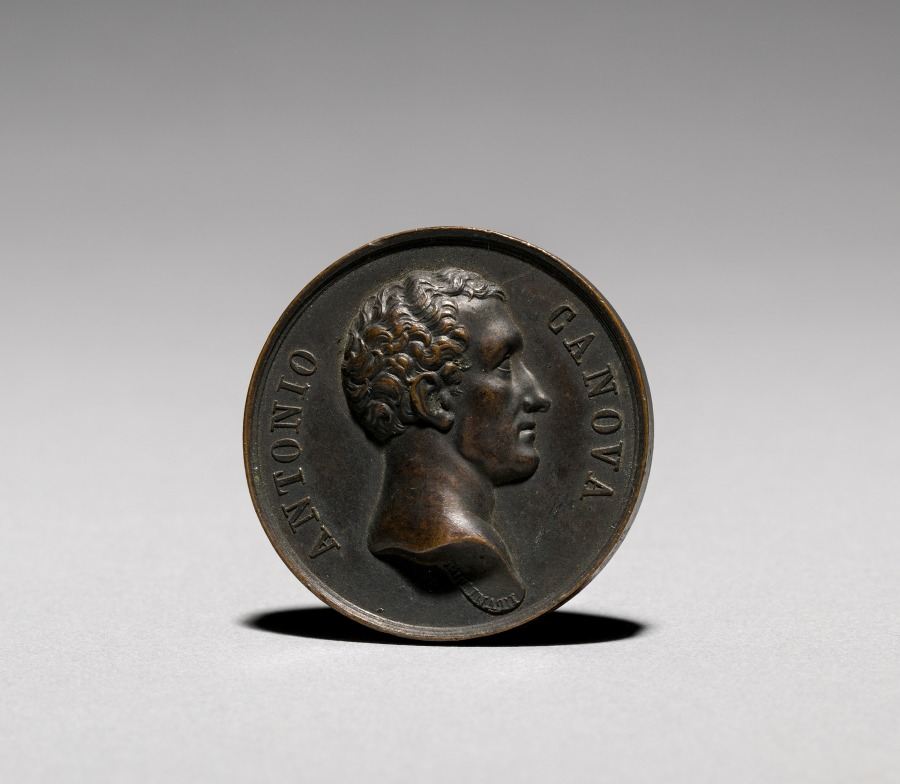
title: Medal: Antonio Canova (obverse)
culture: Italy, 19th century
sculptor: Francesco Putinati (Italian, 1775–1848)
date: early-mid 1800s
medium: bronze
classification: Metalwork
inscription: "ANTONIO CANOVA"; signed: Putinati."